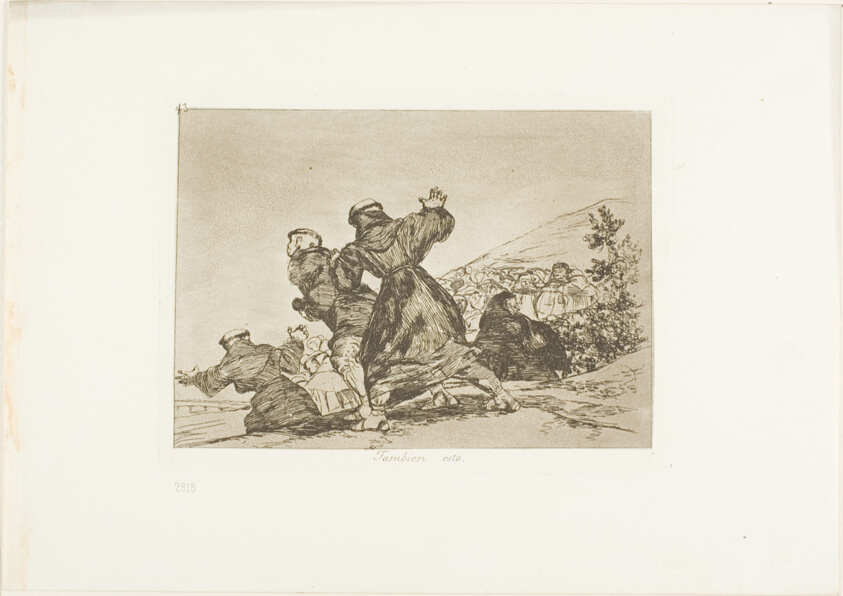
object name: Print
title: This too, plate 43 from The Disasters of War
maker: Francisco José de Goya y Lucientes (Spanish, 1746-1828)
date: 1815/20, published 1863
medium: Etching and burnished aquatint on ivory wove paper with gilt edges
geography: Spain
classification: etching; print; prints and drawing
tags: war